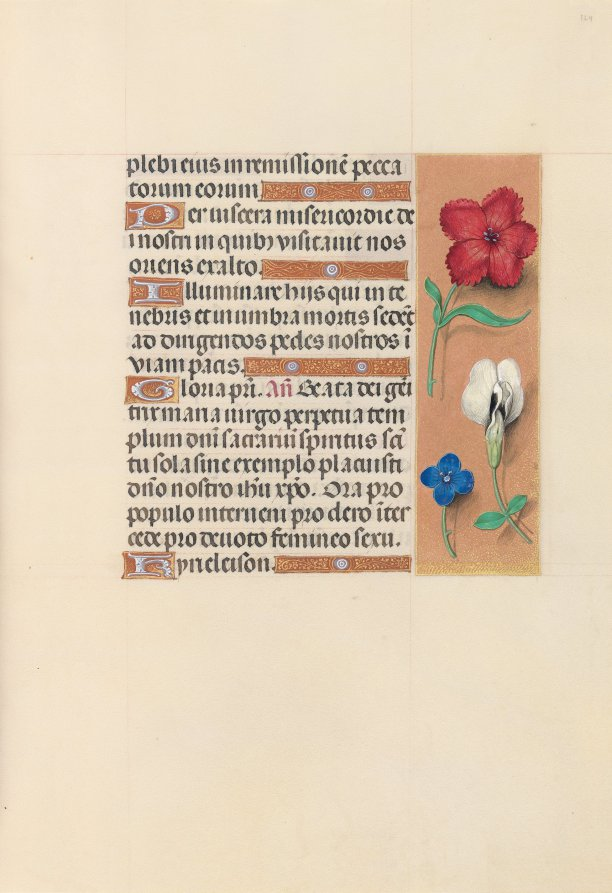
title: Hours of Queen Isabella the Catholic, Queen of Spain: Fol. 124r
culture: Flanders, Ghent and Bruges, late 15th century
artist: Master of the First Prayerbook of Maximillian (Flemish, c. 1444–1519)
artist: and Associates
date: c. 1500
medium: ink, tempera, and gold on vellum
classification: Bound Volume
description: This manuscript was illuminated by a circle of at least five highly organized manuscript painters active in the Flemish cities of Ghent and Bruges. The principal illuminator was Alexander Bening, who painted the majority of the book's miniatures. Manuscripts produced by this circle of artists are renowned for the decoration of their borders, which typically feature a rich variety of realistically-painted flowers, birds, and butterflies. This prayer book, called a book of hours, was intended not for a cleric, but for the private devotions of a lay person-in this case, Isabella the Catholic, Queen of Spain (1451-1504). Isabella's coat of arms embellishes the book's frontispiece. It is unlikely that the book was commissioned by the Queen herself; rather, she probably received it as a diplomatic gift from someone courting her patronage, perhaps Cardinal Francisco Jimenez de Cisneros. A Franciscan friar, Jimenez was dependent upon Isabella for his advancement, first to the post of Queen's confessor in 1492, and then to Archbishop of Toledo in 1495.